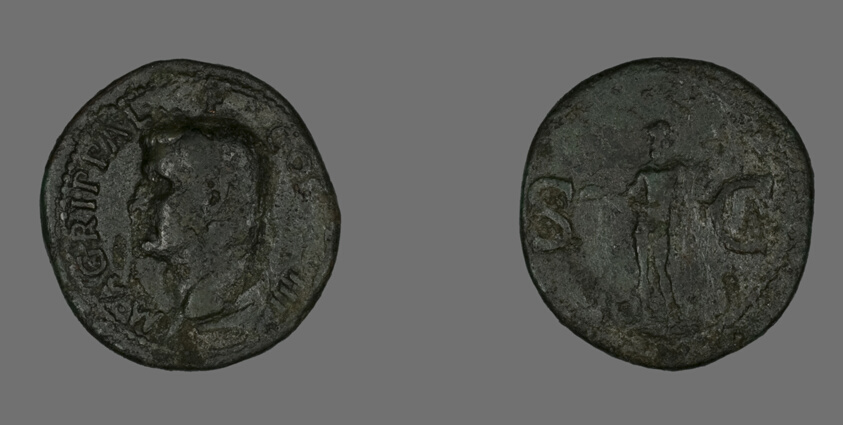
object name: Coin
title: As (Coin) Portraying Agrippa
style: roman (ancient, style or period)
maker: Roman, minted in Rome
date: 14-37 or 37-41?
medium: Bronze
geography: Roman Empire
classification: coin; ancient art